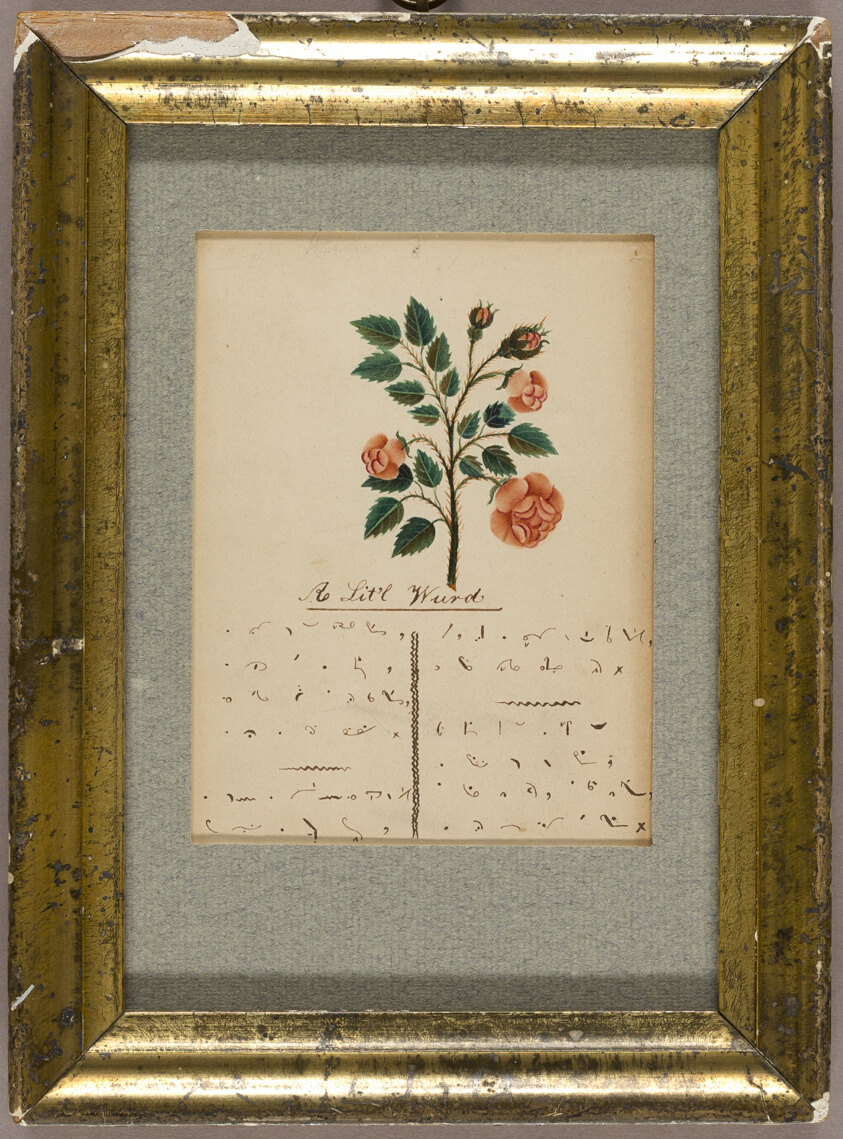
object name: Drawing and Watercolor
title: Lit'l Word (valentine)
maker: Unknown Artist; American or English, 19th century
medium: Watercolor and pen and brown ink on ivory paper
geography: United States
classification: collage; valentine; prints and drawing; paper